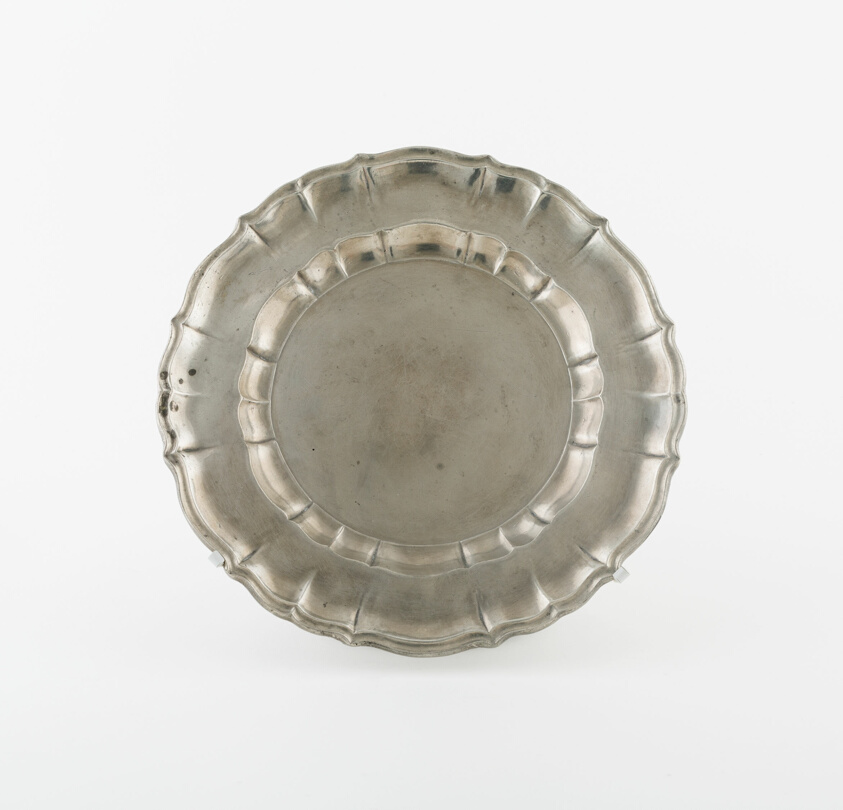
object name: Metalwork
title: Plate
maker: Anton Singer; Austrian, active c. 1745; Austria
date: c. 1745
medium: Pewter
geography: Austria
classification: plate (general, dish); pewter; dish (vessel); metalwork; european decorative arts